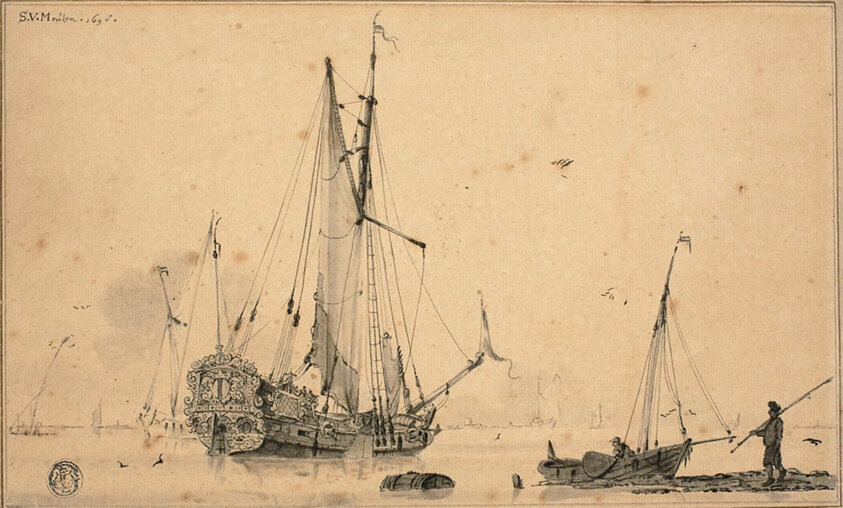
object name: Drawing and Watercolor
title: Harbor Scene with Ships and Fisherman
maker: Sieuwert van der Meulen (Dutch, c. 1698-1730)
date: 1698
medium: Brush and black ink and gray wash, with touches of graphite, on tan laid paper, laid down on tan wove card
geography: Netherlands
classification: ink or chalk wash; drawings (visual works); prints and drawing